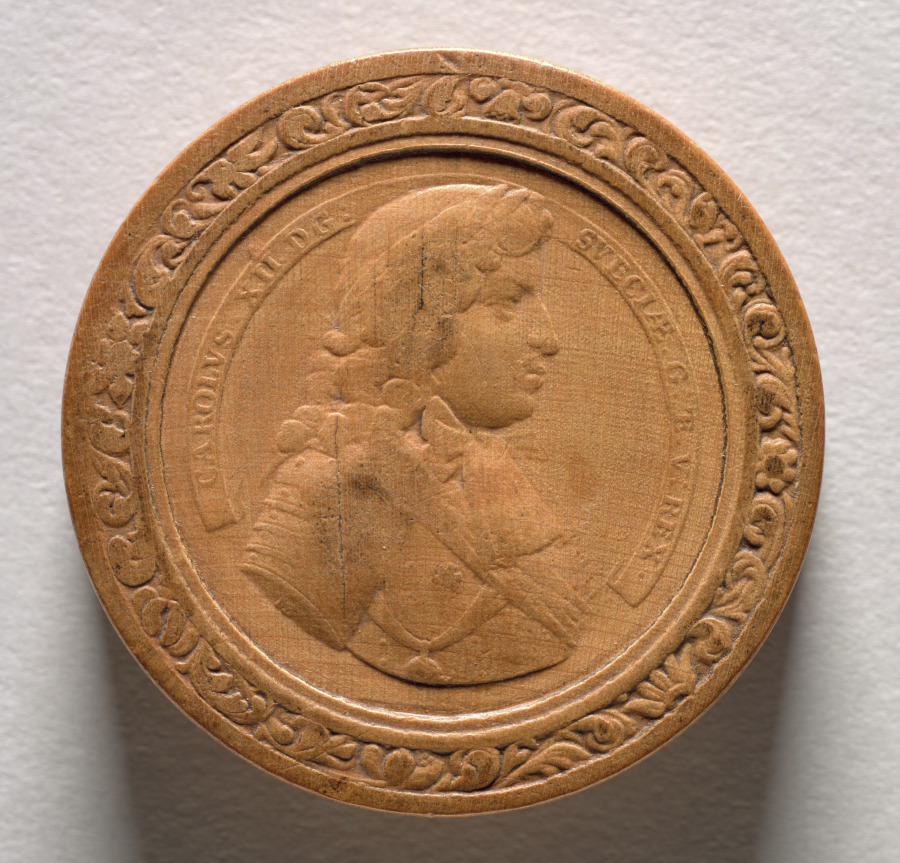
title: Gaming Piece (obverse)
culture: Germany, late 17th-early 18th Century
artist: Martin Brunner (German, 1659–1725)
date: c.1700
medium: wood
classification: Furniture and woodwork